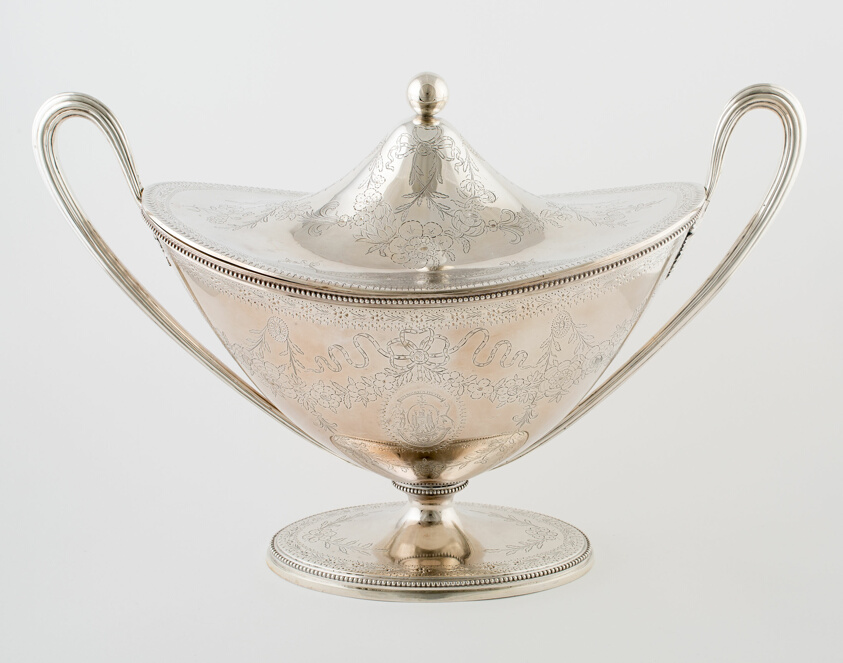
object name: Metalwork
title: Tureen with Cover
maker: William Davie; Scottish, active after 1740; Edinburgh, Scotland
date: 1783/84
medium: Sterling silver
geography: Edinburgh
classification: silver; metalwork; european decorative arts